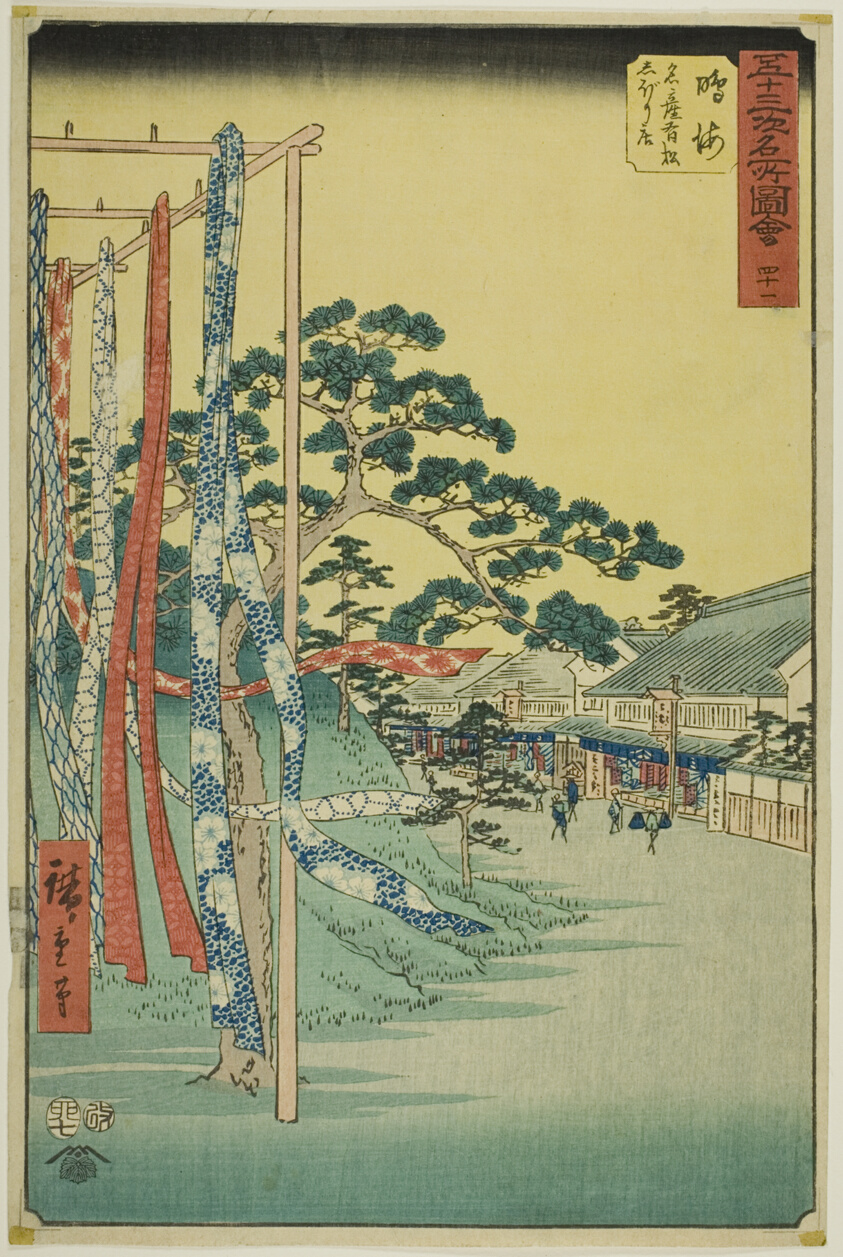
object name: Print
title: Narumi: Shop wth Famous Arimatsu Tie-dyed Cloth (Narumi, meisan Arimatsu shibori mise), from the series "Famous Sights of Fifty-three Stations (Gojusab tsugi meisho zue)"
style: Japanese (culture or style)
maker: Utagawa Hiroshige 歌川 広重; Japanese, 1797-1858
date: 1855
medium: Color woodblock print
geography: Japan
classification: woodblock print; print